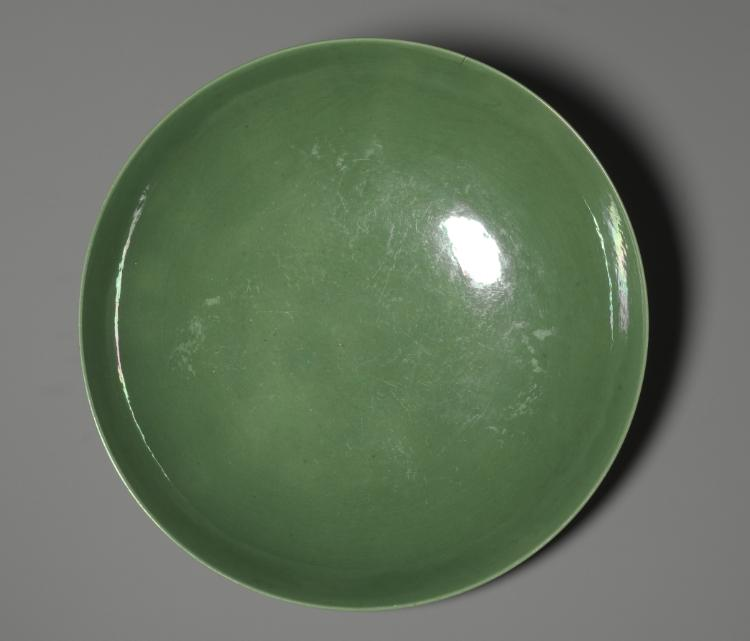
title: Dish with Green Glaze and Carved Floral Designs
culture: China, Qing dynasty (1644-1911), Qianlong mark and reign (1735-1795)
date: 1736–95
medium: glazed porcelain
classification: Ceramic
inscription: 大清乾隆年制